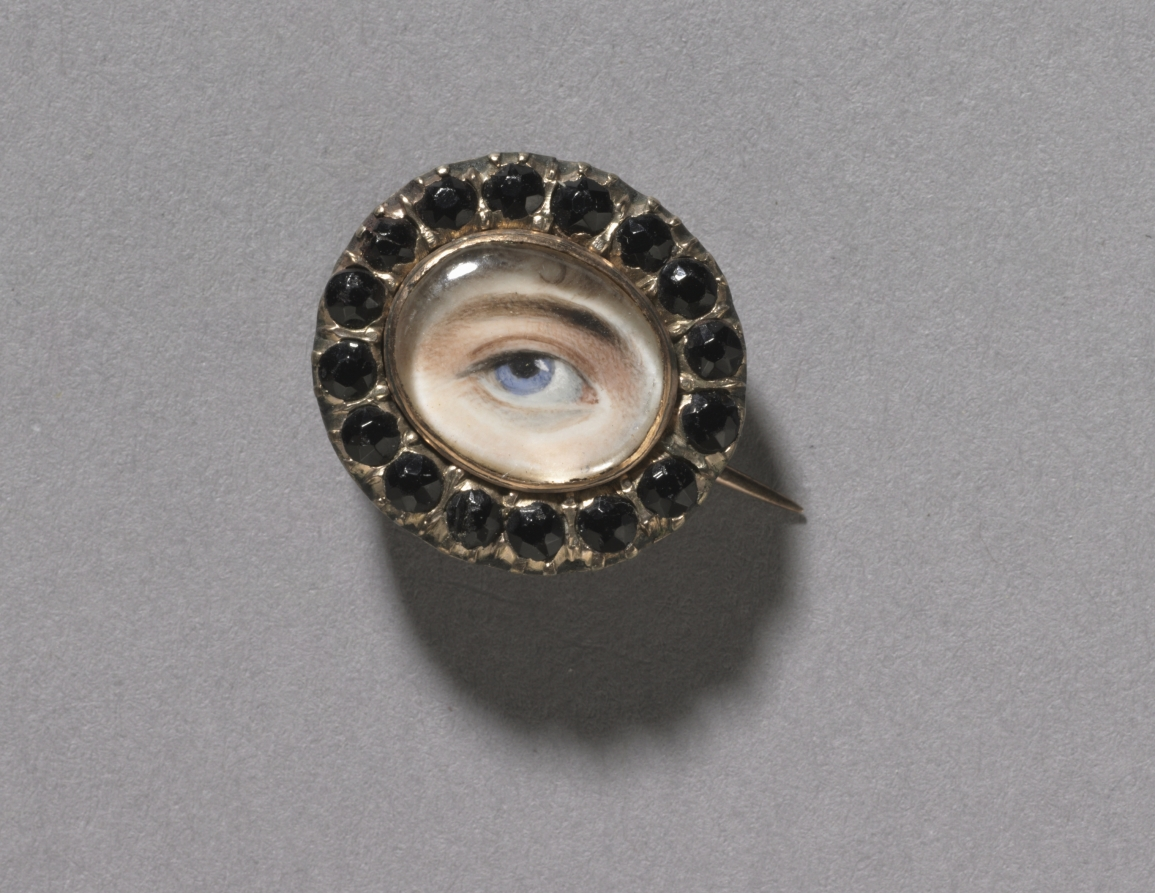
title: Eye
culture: America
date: c. 1830s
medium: watercolor on ivory in a gilt metal frame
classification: Portrait Miniature